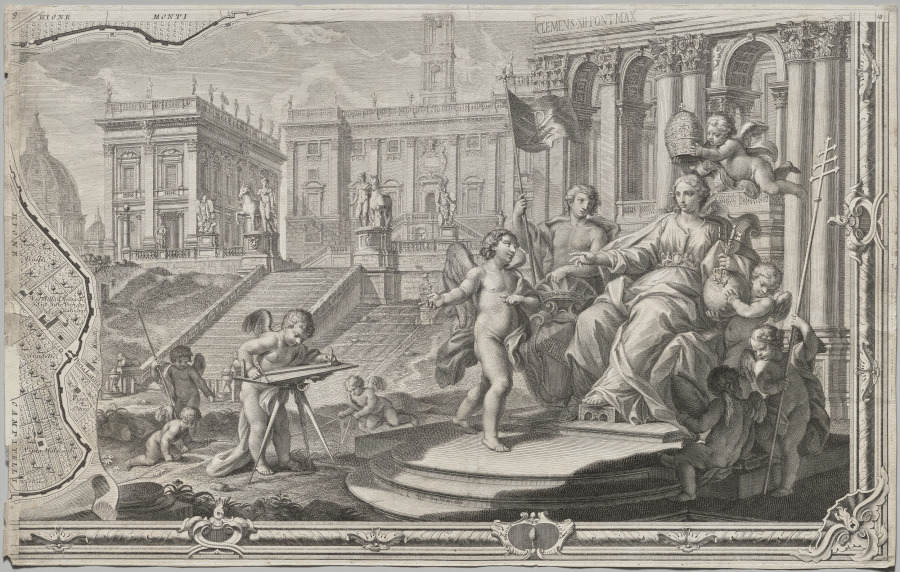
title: Nuova pianta di Roma data in luce da Giambattista Nolli l’anno MDCCXLVII, known as La Pianta Grande di Roma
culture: Italy, 18th century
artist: Giovanni Battista Nolli (Italian, 1701–1756)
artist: Carlo Nolli (Italian, 1690–1790)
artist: Rocco Pozzi (Italian, 1701–1774)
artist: Pietro Campana de Soriano (Italian, 1725–c. 1779)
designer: Stefano Pozzi (Italian, 1699–1768)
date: 1748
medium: etching and engraving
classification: Print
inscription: Written in pencil on verso: "20+/[illegible] Lyon [illegible] 1903/[illegible] 20/La vielle de Rome, reconnaissante des embellissements/du Pape Clement XII/tient en main les clefs de la ville/et lui prepare la tiare, insignes/de confiance et d'authorite/25 frs (?)"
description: The monumental Pianta Grande di Roma, or Large Plan of Rome, which measures about 5 x 7 feet when its twelve plates are assembled, is a landmark in both cartography and printmaking. The map is considered the first scientific rendering of Rome, establishing new standards of accuracy and thoroughness when it was published in 1748. Devised by the Lombard architect and surveyor Giovanni Battista Nolli (Italian, 1701-56), the creation of the map required over ten years of surveying the city carried out by Nolli and a team of assistants with the help of new measuring devices. In Nolli’s “ichnographic” (also called “ground”) plan, architectural features and the urban infrastructure are reduced to a single horizontal slice, a minutely detailed footprint that conveys dimensions, proportions, and orientations to scale with the utmost clarity.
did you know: To make this map, Pope Clement XII granted the mapmaker permission to measure courtyards and other interior, inaccessible spaces in monastic communities, even those in nuns’ convents, which was controversial at the time.